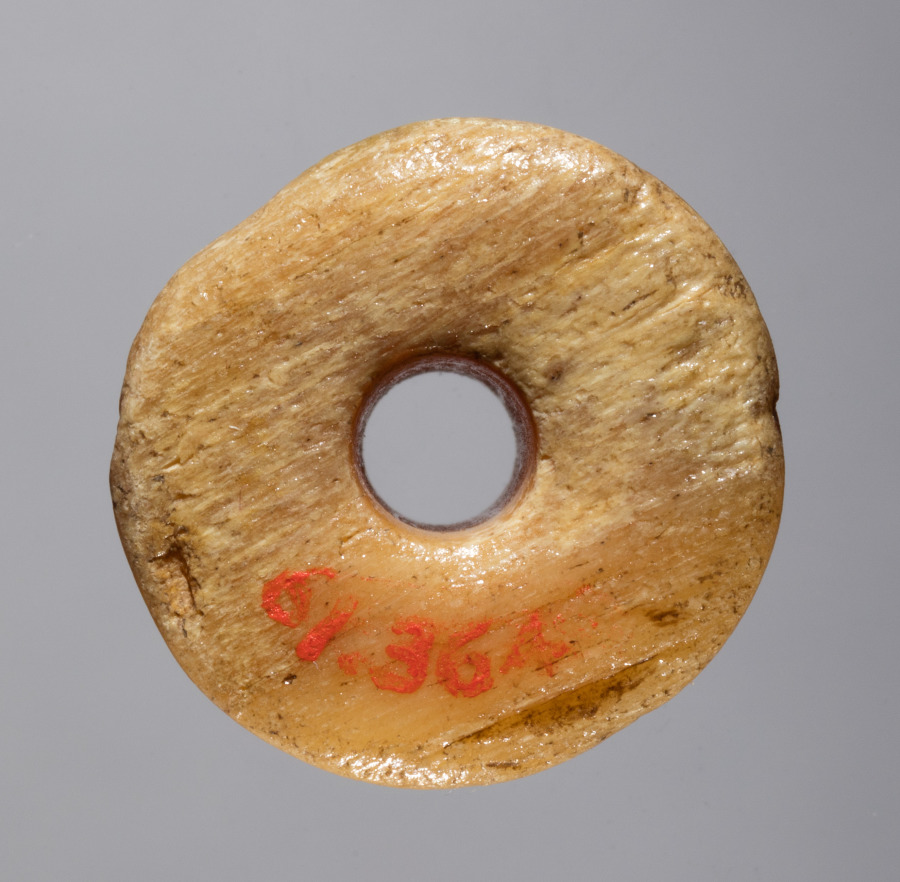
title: Spindle Whorl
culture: Iran, early Islamic period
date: 700s - 900s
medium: bone, incised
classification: Spindle Whorl